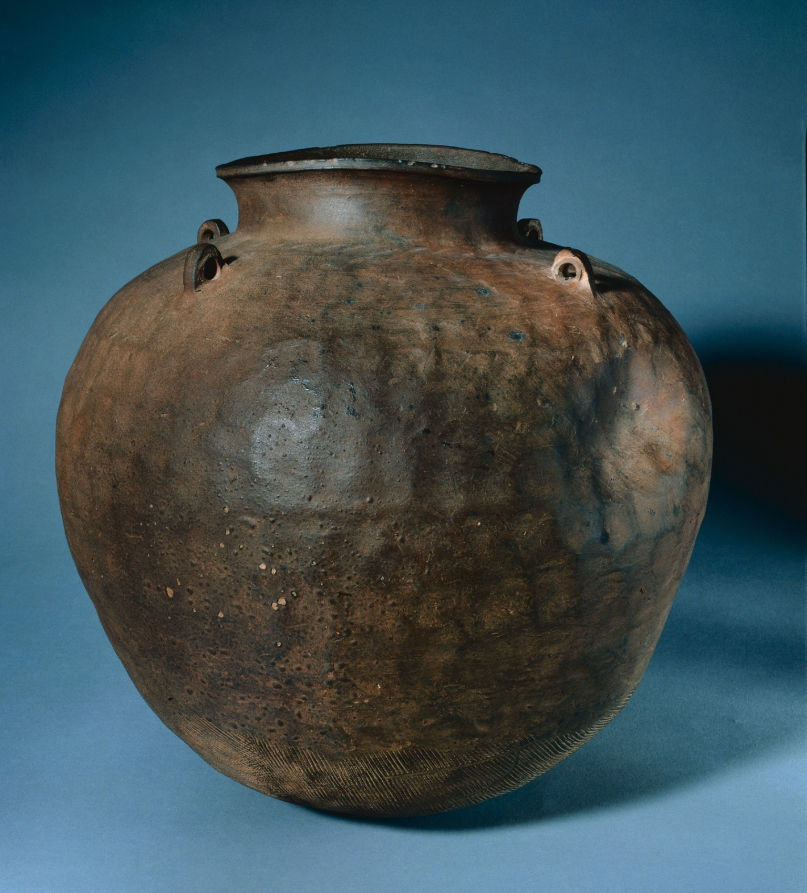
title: Short-necked Storage Jar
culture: Korea, Three Kingdoms period (57 BCE–668 CE)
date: 300s CE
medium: gray earthenware with impressed cord design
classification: Ceramic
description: Early earthenware from the Three Kingdoms period is characterized by the jar's gray hue. Closed kiln chambers built on hillsides, which fired clay as high as 2000°F, maintained a low level of oxygen saturation. The loops on its round shoulder suggest that the jar once had a lid fastened by cords. The function of this type of large jar remains unknown, yet it is highly possibly that it was used to store harvested grains and seeds. The pounding technique (tanal in Korean) used to treat the surface strengthened the clay body.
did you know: The surface of this pottery jar was treated by the pounding technique.